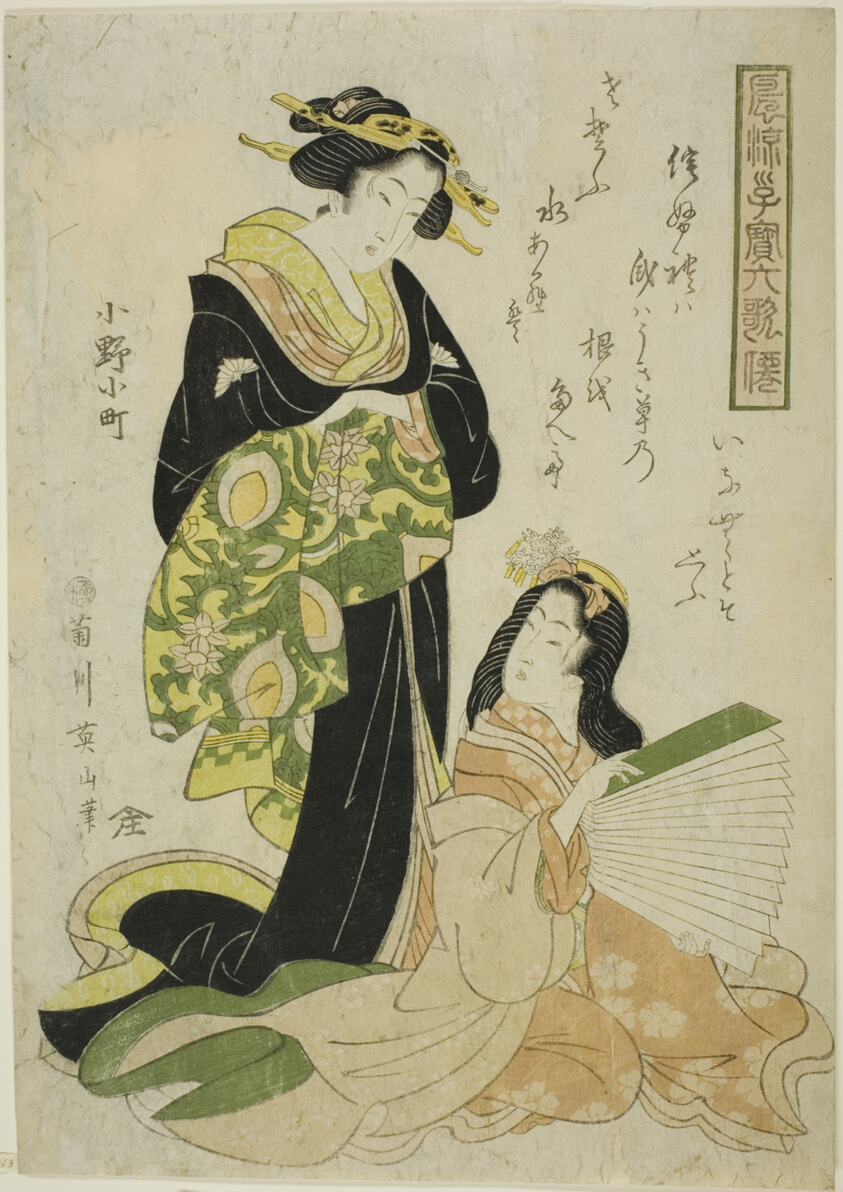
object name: Print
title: Ono no Komachi, from the series "Fashionable Children as the Six Immortal Poets (Furyu kodakara rokkasen)"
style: Japanese (culture or style)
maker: Kikukawa Eizan (Japanese, 1787-1867)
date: c. 1814/17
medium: Color woodblock print; oban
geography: Japan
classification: woodblock print; print; asian art